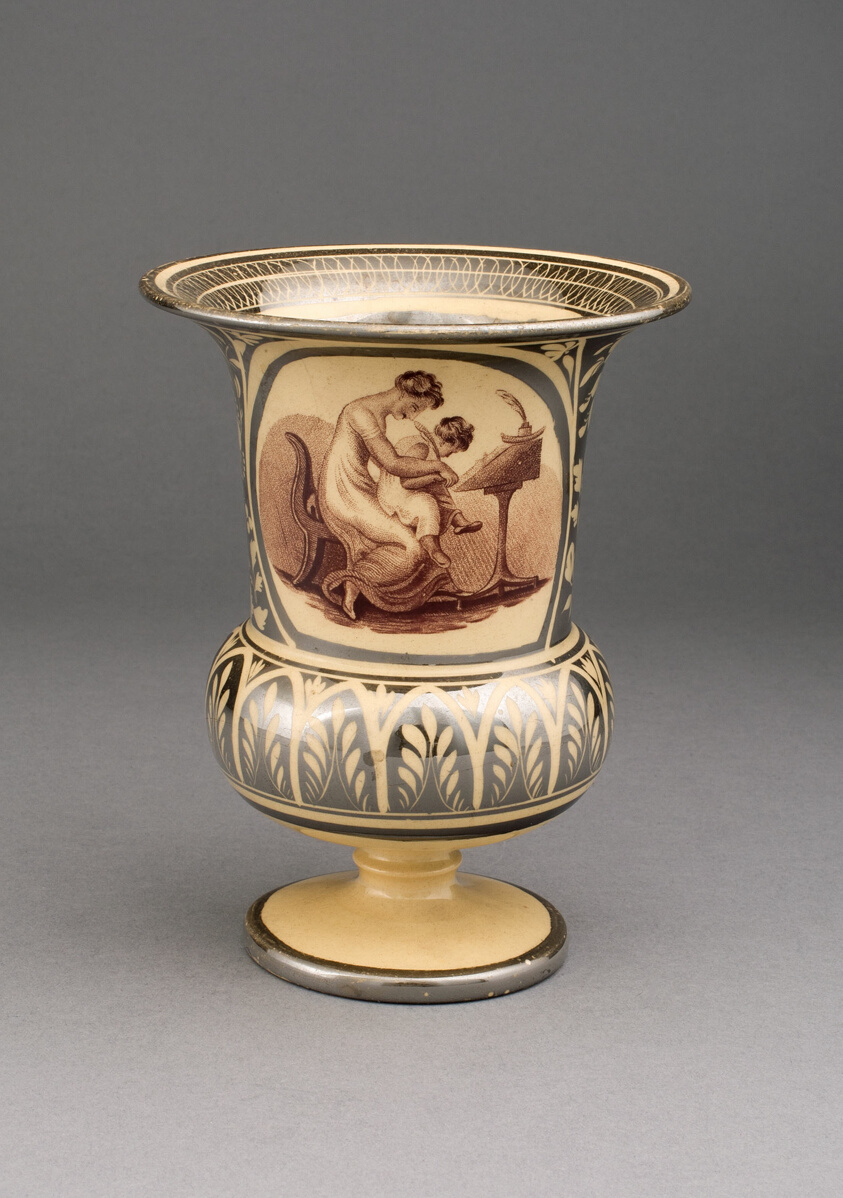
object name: Ceramics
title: Vase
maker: England, Leeds; With Transfer Decoration after Adam Buck; Irish, 1759-1833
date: c. 1820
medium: Earthenware with silver lustre decoration, monochrome brown, and yellow ground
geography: Leeds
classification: vase; vessel; ceramics; european decorative arts; earthenware